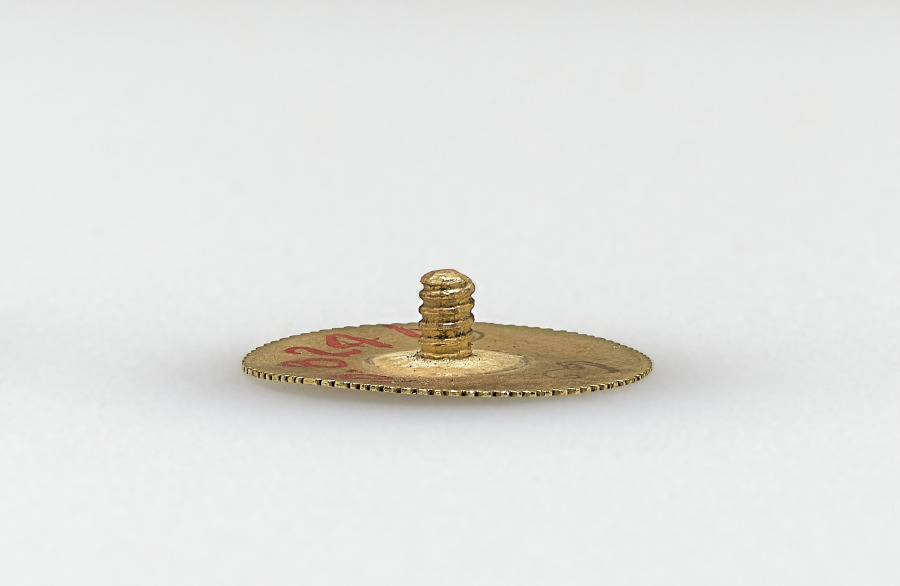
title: Earring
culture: Burma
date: 1800s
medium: gold and rubies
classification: Jewelry